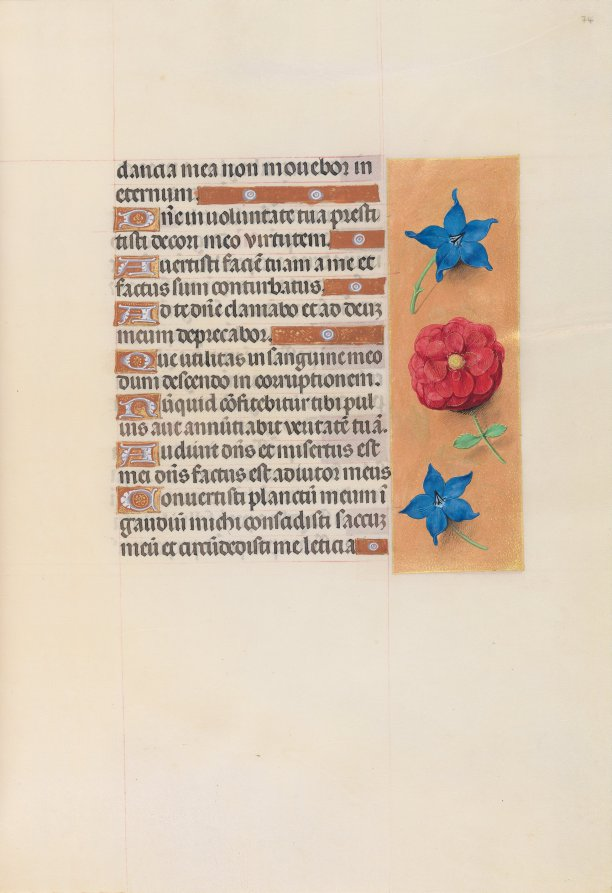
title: Hours of Queen Isabella the Catholic, Queen of Spain: Fol. 74r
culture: Flanders, Ghent and Bruges, late 15th century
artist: Master of the First Prayerbook of Maximillian (Flemish, c. 1444–1519)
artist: and Associates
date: c. 1500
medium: ink, tempera, and gold on vellum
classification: Bound Volume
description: This manuscript was illuminated by a circle of at least five highly organized manuscript painters active in the Flemish cities of Ghent and Bruges. The principal illuminator was Alexander Bening, who painted the majority of the book's miniatures. Manuscripts produced by this circle of artists are renowned for the decoration of their borders, which typically feature a rich variety of realistically-painted flowers, birds, and butterflies. This prayer book, called a book of hours, was intended not for a cleric, but for the private devotions of a lay person-in this case, Isabella the Catholic, Queen of Spain (1451-1504). Isabella's coat of arms embellishes the book's frontispiece. It is unlikely that the book was commissioned by the Queen herself; rather, she probably received it as a diplomatic gift from someone courting her patronage, perhaps Cardinal Francisco Jimenez de Cisneros. A Franciscan friar, Jimenez was dependent upon Isabella for his advancement, first to the post of Queen's confessor in 1492, and then to Archbishop of Toledo in 1495.